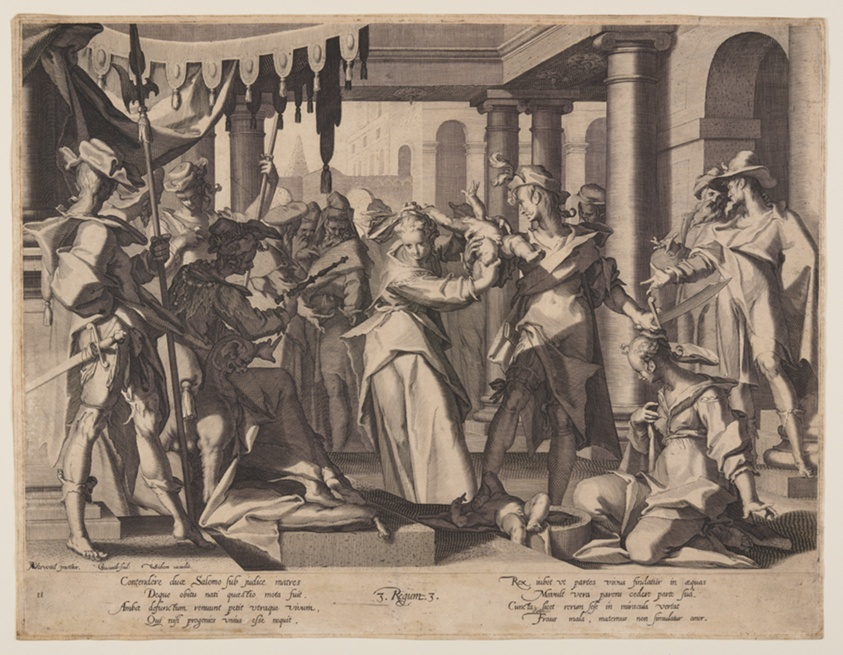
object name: Print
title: Judgment of Solomon, plate 2 from Thrones of Justice (Thronus Iustitiae)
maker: Willem van Swanenburgh (Dutch, 1580–1612); after Joachim Wtewael (Dutch, 1566–1638)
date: 1606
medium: Engraving on ivory laid paper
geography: Netherlands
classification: print; paper; prints and drawing; engraving